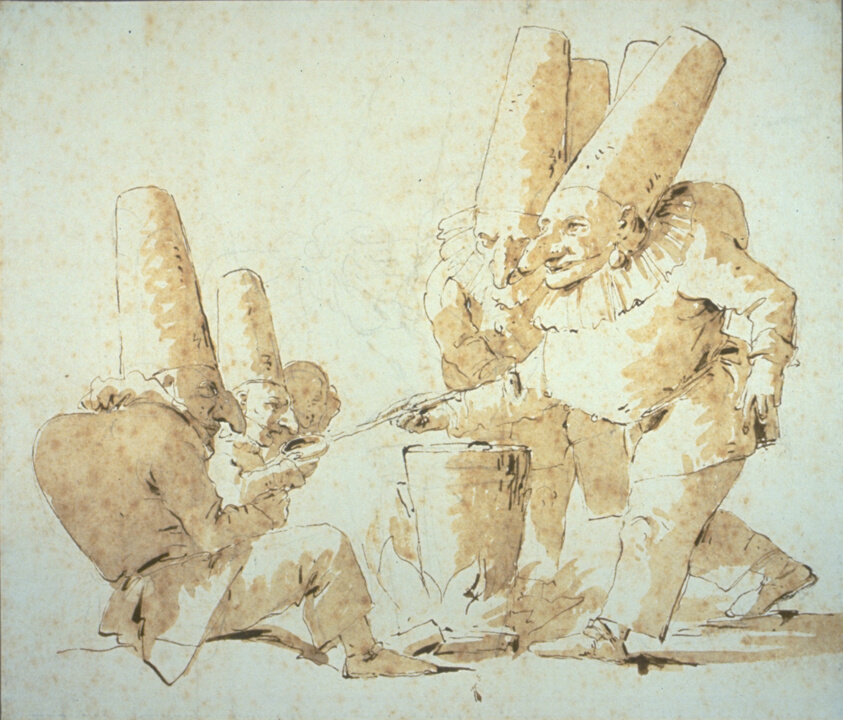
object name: Drawing and Watercolor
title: Punchinellos Cooking and Tasting Gnocchi (Punchinellos' Repast)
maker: Giovanni Battista Tiepolo (Italian, 1696–1770)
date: 1740/52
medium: Pen and brown ink, and brush and brown wash, over a graphite underdrawing, on cream laid paper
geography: Italy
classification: pen and ink drawings; drawings (visual works); prints and drawing